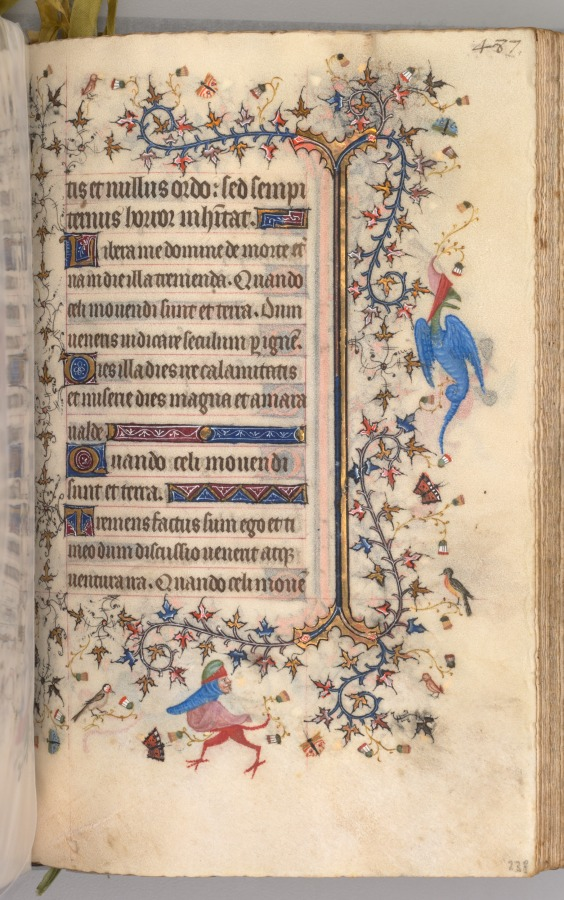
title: Hours of Charles the Noble, King of Navarre (1361-1425): fol. 238r, Text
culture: France, Paris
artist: Master of the Brussels Initials and Associates (French)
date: c. 1405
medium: ink, tempera, and gold on vellum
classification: Bound Volume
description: This precious volume was obviously highly prized by its owner, the French-born King of Navarre, who had his coat of arms painted on no less than twenty folios. Rather than directly commissioning this manuscript from a specific workshop, it seems that Charles the Noble acquired his book of hours -- perhaps ready-made for the luxury market -- while on a trip to Paris in 1404-05. A collaborative effort, six painting styles are evidenced within the pages of this codex, those of two Italians, two Frenchmen, and two Netherlanders. The painter who was responsible for the planning and decoration of the book, and who produced seventeen of the large miniatures, was a Bolognese artist known as the Master of the Brussels Initials. His principal assistant, responsible for most of the borders, was a Florentine who signed his name "Zecho" da Firenze on folio 208 verso.